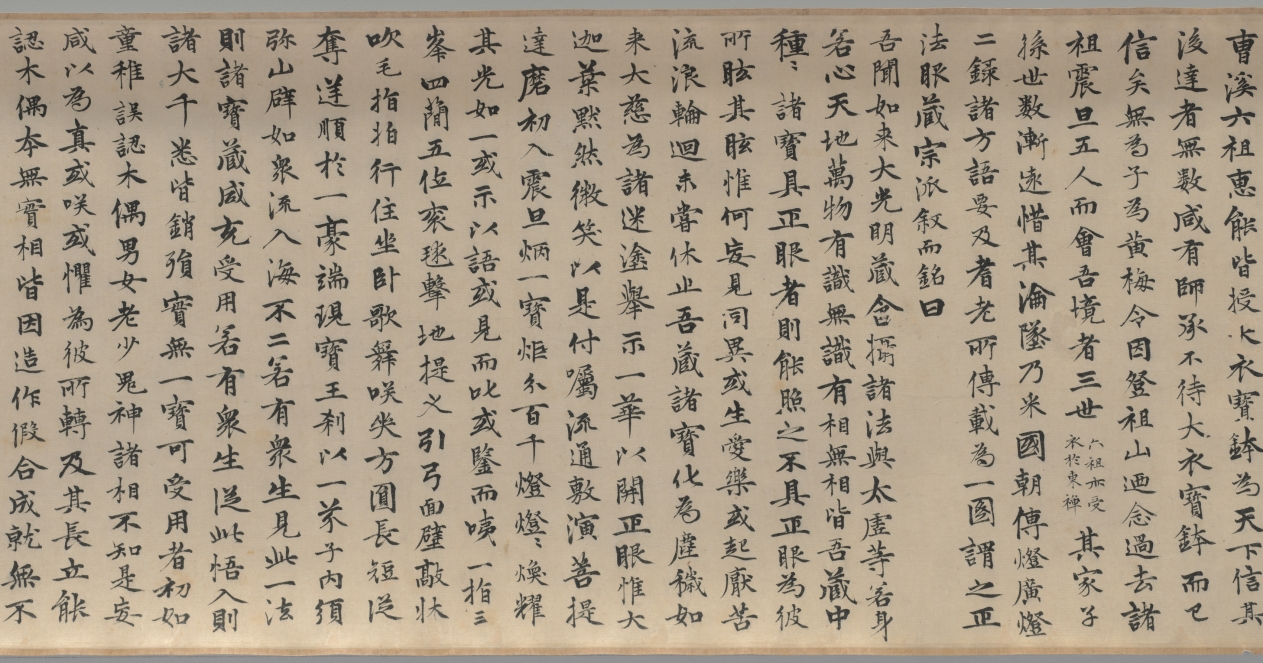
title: Barbarian Royalty Worshiping the Buddha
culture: China, Northern Song dynasty (960-1127)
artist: attributed to Zhao Guangfu (Chinese, c. 923–976)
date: 900s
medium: Handscroll; ink and color on silk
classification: Painting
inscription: 佛法入中國千餘年。殆是家有其像。見之者悉起敬心，不當以古今畫手分別也。 子昂 [印]趙氏子昂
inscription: Colophon by Guo Bi (1280–1335): A transcription of "Zheng fa yan zang ming bing xu" 正法眼藏銘幷序 by Wuwei Jushi 無為居士. Signature: Situi Jushi Guo Bi 思退居士郭畀. 2 seals.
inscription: Spurious artist's signature: Zhao Guangfu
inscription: 1 seal of the Li family (Yuan Dynasty)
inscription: 14 seals of Qianlong Emperor (r. 1736–95)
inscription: 1 seal of Jiaqing Emperor (r. 1796–1820)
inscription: 1 seal of Xuantong Emperor (r. 1909–11)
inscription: 1 official seal of the Yuan dynasty, “Tian li zhi bao 天曆之寶” (Treasure of Tianli).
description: This painting begins on the right with 15 people following a dignified figure wearing headgear with twin pheasant feathers. He extends an incense burner toward the Buddha, who is seated on his lotus throne and flanked by two haloed disciples and two Heavenly Kings. The worshipers’ diverse physical features, regional finery, and religious affiliations suggest the universal appeal of Buddhism. The imagery was inspired by the foreign envoys who frequently came to the Chinese court to give tribute to the emperor. At the time, all outsiders were considered “barbarians,” so their presence was seen as acknowledgment of China’s political and cultural power.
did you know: Sixteen "barbarians" pay homage to the Buddha, who is seated on a lotus throne with two disciples and two guardians.